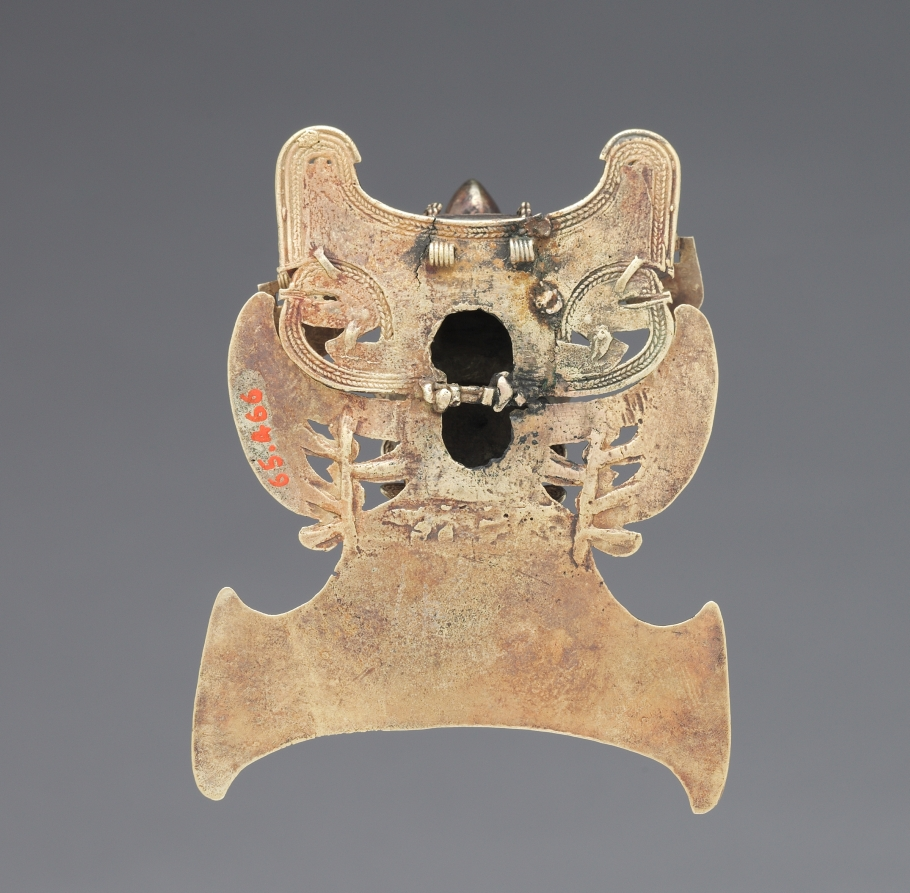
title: Bird Pendant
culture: Colombia, Tairona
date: 900–1550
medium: cast gold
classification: Metalwork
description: Tairona-style pendants are among the most spectacular of all ancient American gold ornaments, in part because of the detail achieved with lost-wax casting. The traits of the figure pendant include a lower lip ornament and a headdress in which two bats hang upside down. Although called caciques (chieftains), that is, ruler portraits, the meaning of such figures is not well understood. Bird imagery was important in the isthmian region in ancient times and remains so today. For instance, among the modern Bribri of Costa Rica, the principal creator deity (Sibo) takes the form of a buzzard or kite who wears a collar. Collars are standard features of ancient bird pendants, like the one shown here.